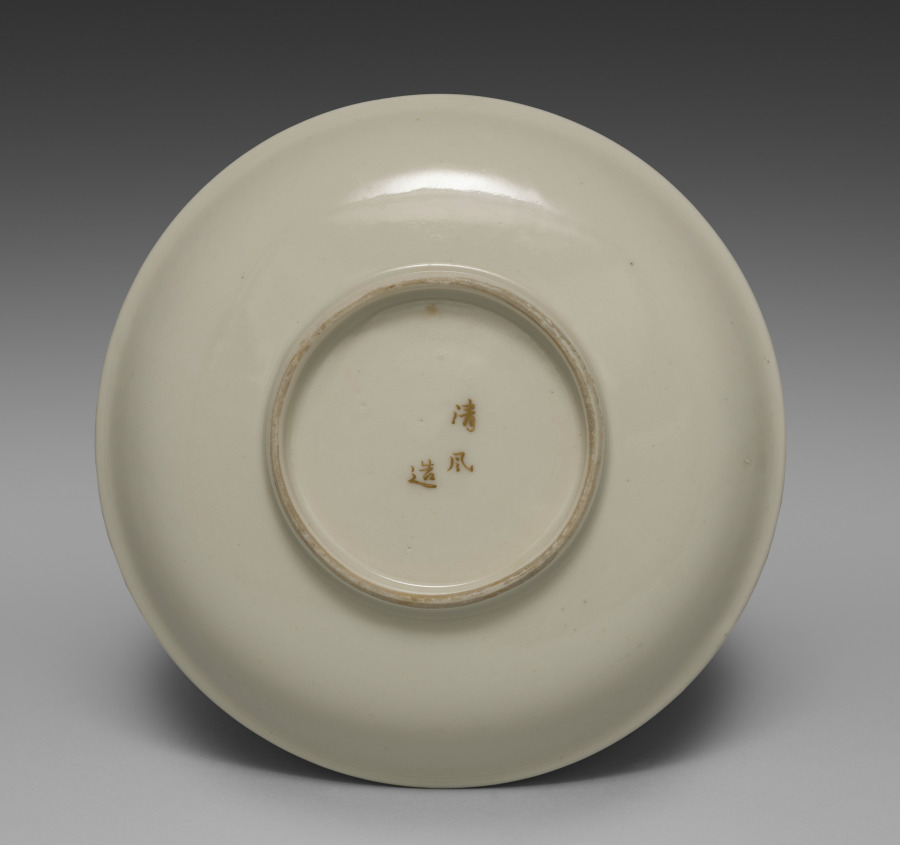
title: Medium-sized Dish from Dining Set with Plum Blossoms and Cracked-Ice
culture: Japan, Meiji period (1868–1912)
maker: Seifū Yohei II (Japanese, 1844–1878)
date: c. 1875–78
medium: Porcelain with molded designs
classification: Ceramic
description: Each item in this set has a delicate low-relief design of flowering plum branches over scattered, intersecting lines meant to resemble the cracked-ice surface of a frozen body of water and is signed on the base in gold pigment. While Yohei II produced many fine works in underglaze blue, like those produced by Kiyomizu Shichibei, he also made works in quite different styles later in his career, from the early 1870 s. In 1873, he was appointed purveyor to the Industrial Center of Kyoto Prefecture, a designation associated with Kyoto’s efforts to reach an international market through the port of Kobe; and from 1875 until his death, he was involved in national-level projects to present Japanese ceramics across the world. It was during this period that Yohei III was apprenticed to Yohei II, and it has been suggested that this set may in fact be an early example of Yohei III’s work, which he signed with his teacher’s name. Decorated with flowers resembling Japanese textile motifs, the set calls to mind the design of Yohei II’s pair of vases with plum blossoms in the Victoria and Albert Museum. Here, the elaborate trees created for a formal public exhibition setting have been translated into the approachable blossoms of the genteel domestic environment. While the designs are consistent across the pieces, each raised flower petal and pistil and each incised line in the ice was done by hand, so the cups, bowls, and dishes are similar yet unique. The bottoms of two boxes once identified the set’s owner, but the information has been deliberately obscured with black ink. However, inscriptions still visible appear to indicate two occasions, once at the end of July 1886 , and once again in June 1916 , when parts of the set were requested from Hokura in Niigata Prefecture. The location corresponds to a neighborhood in the present-day city of Jōetsu. The surname Tsuji 辻 also appears on a paper tag affixed to one of the box cloths. Future research may possibly reveal more about their provenance. A vase by Yohei III in a private collection combines the formal grandeur of the Yohei II vases in the Victoria and Albert Museum with the gentler design of this dining set, placing flowering plum trees against soft, scalloped-edge clouds resembling those in golden screens.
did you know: The dining wares have a creamy white coloration that the four boxes containing them identify as Korean in style.